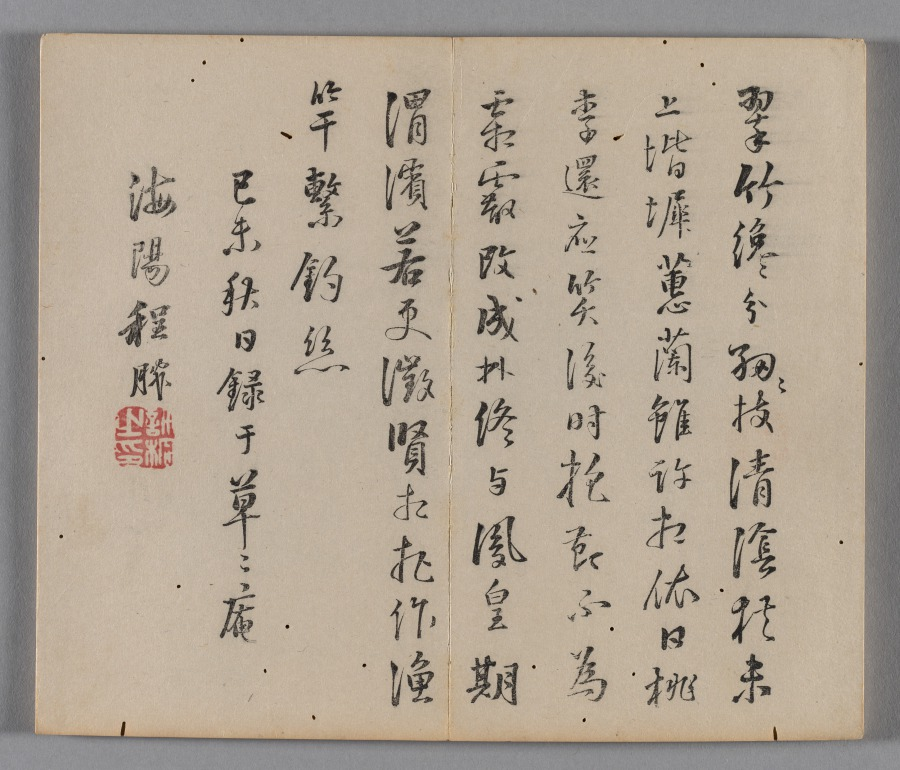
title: Ten Bamboo Studio Collection of Calligraphy and Painting: Miscellaneous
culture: China, Qing dynasty (1644-1911)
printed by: Hu Zhengyan (Chinese, c. 1584–1674)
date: 1633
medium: Woodblock-printed book; ink and colors on paper; first edition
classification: Print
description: Color printing reached a level of perfection in the early 1600s, as seen in this Ten Bamboo Studio Collection of Calligraphy and Painting and the Mustard Seed Garden Manual of Painting (printed 1679 and 1701). The painterly quality, precision in registering (aligning) the woodblocks, and harmonious colors made them the most successful color print editions in Chinese history. Both editions were printed and compiled in Nanjing, spread nationwide, and had a great impact on the arts in Japan and Korea.